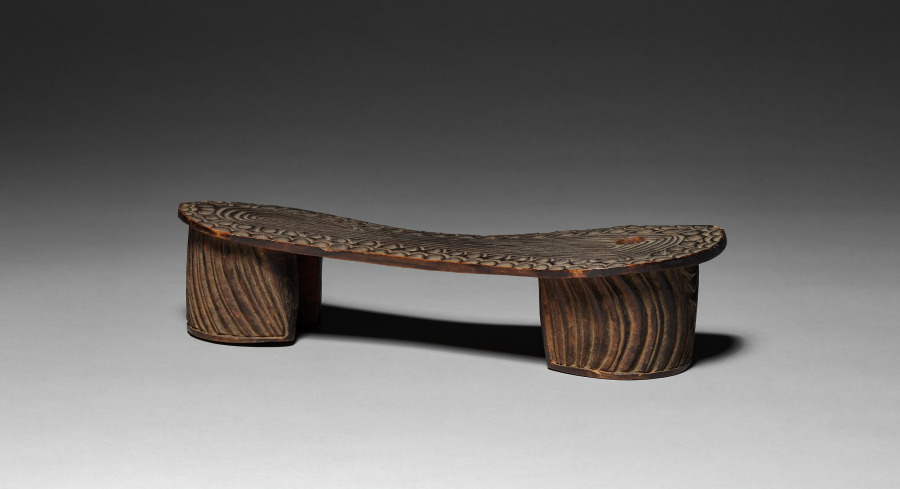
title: Base for a sandal (mtalawanda / mtawanda) or Clog (kiatu cha mti)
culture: Africa, Central Africa, Democratic Republic of Congo, unidentified carver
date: c 1800s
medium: Wood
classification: Garment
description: Common in the Indian Ocean region, wooden sandals changed meaning across place and time. This pair’s base elevates the foot as the toes grip an antelope-shaped peg (msuruaki). Crisp geometric sole designs suggest they were rarely worn. East African elites and merchants once had exclusive rights to wooden shoes, wearing elaborate ones only for portraits. Formerly enslaved people living along the coast wore simpler ones from the 1840s onward, adopting elite footwear to assert their liberation. However, slave traders like the Zanzibari “Tippu Tip” (c. 1832–1905) likely brought mitalawanda to Central Africa; stylistic elements of this pair hail from that region.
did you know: This distinctive footwear traveled from Southeast Asia and the Middle East to Africa, first to the Swahili Coast and then further inland to parts of Central Africa. The deity Krishna wears similar shoes (paduka) in an eighteenth-century Indian miniature painting (2003.344).